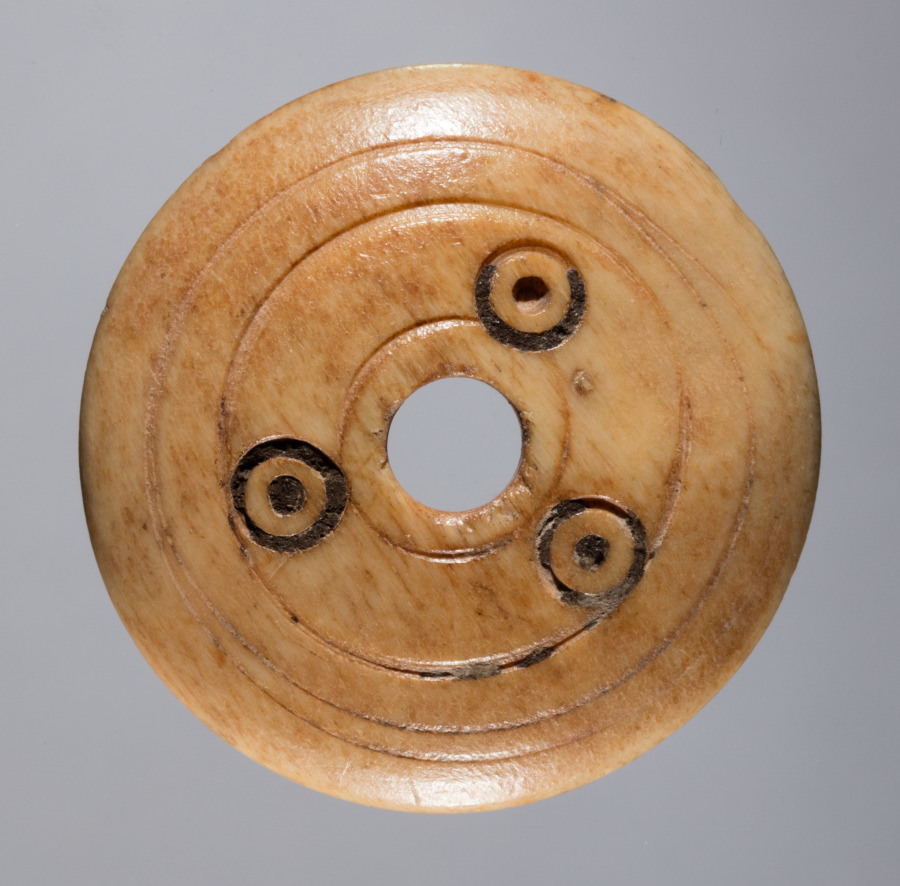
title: Spindle Whorl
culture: Iran, early Islamic period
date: 700s - 900s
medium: bone, incised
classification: Spindle Whorl